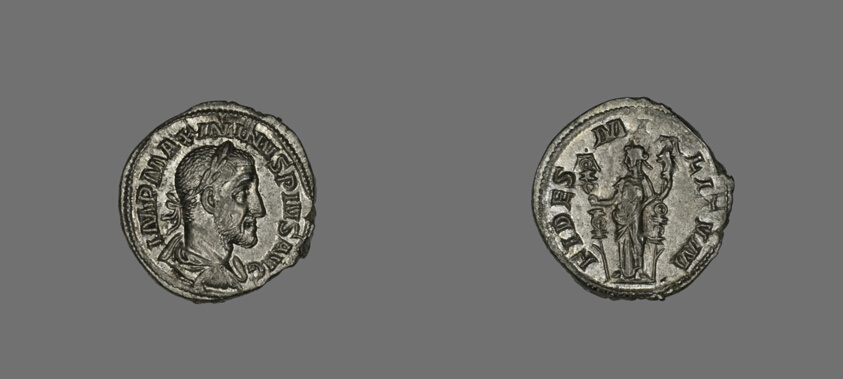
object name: Coin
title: Denarius (Coin) Portraying the Emperor Maximinus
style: imperial (roman), roman (ancient, style or period)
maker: Roman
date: 235 (March)-236 (January)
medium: Silver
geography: Rome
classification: coin; ancient art